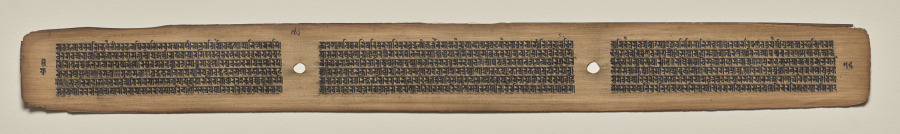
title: Text, Folio 76 (verso), from a Manuscript of the Perfection of Wisdom in Eight Thousand Lines (Ashtasahasrika Prajnaparamita-sutra)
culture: Eastern India, Bihar, Vikramashila Monastery. Painting: Nepal, Kathmandu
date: Sunday, September 14, 1119 (year 239 of the Newar Samvat in the month of Ashvina)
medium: gum tempera and ink on palm leaves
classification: Painting